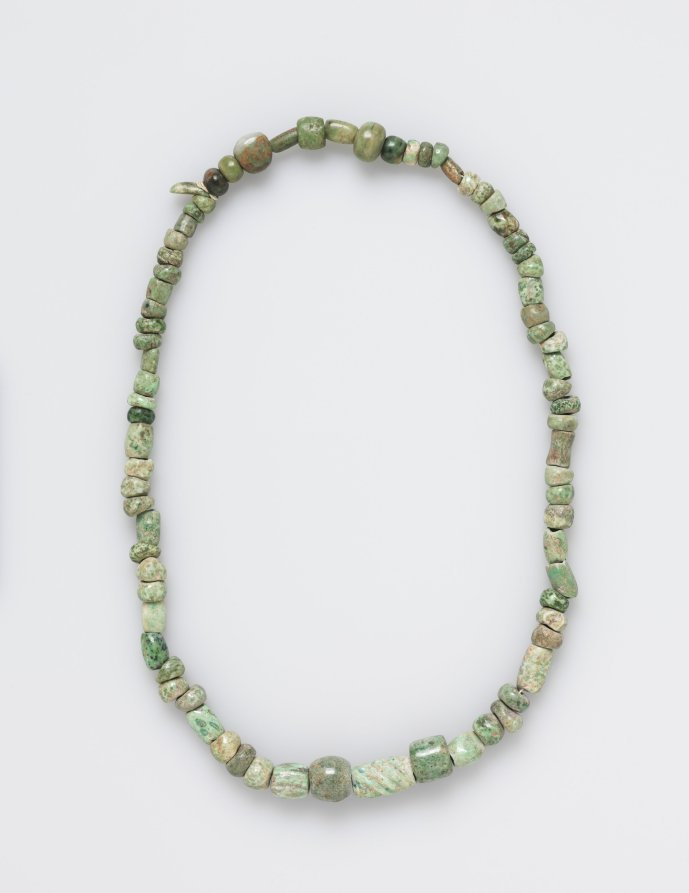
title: Beads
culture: Mesoamerica, Pre-Columbian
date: before 1519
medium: polished green stone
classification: Jewelry